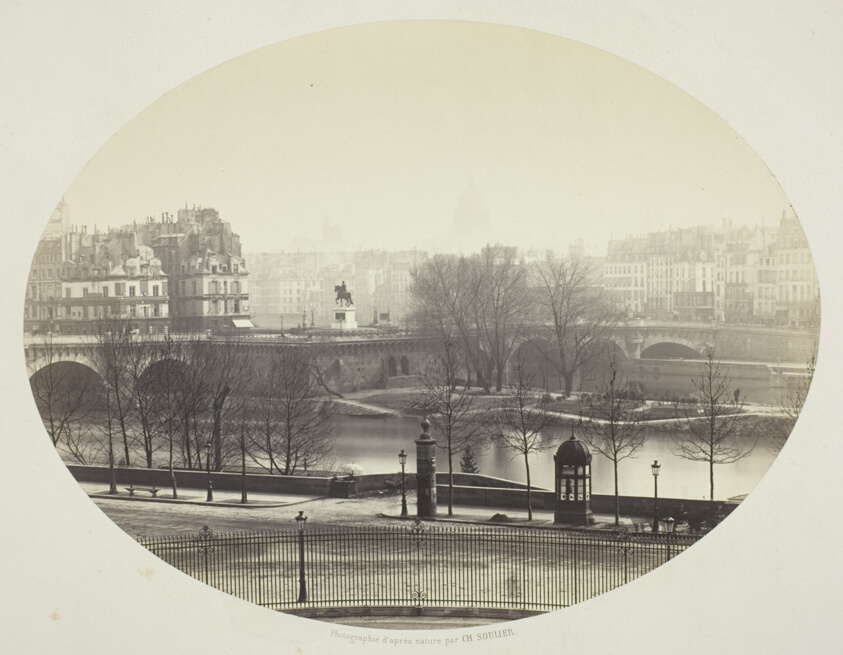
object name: Photograph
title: The Pont Neuf in Paris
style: 19th century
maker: Charles Soulier (French, 1840–1875)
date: 1860/75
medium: Albumen print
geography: France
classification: albumen silver print; photographic process; photography; photograph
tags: Collected by Hugh Edwards, Paris